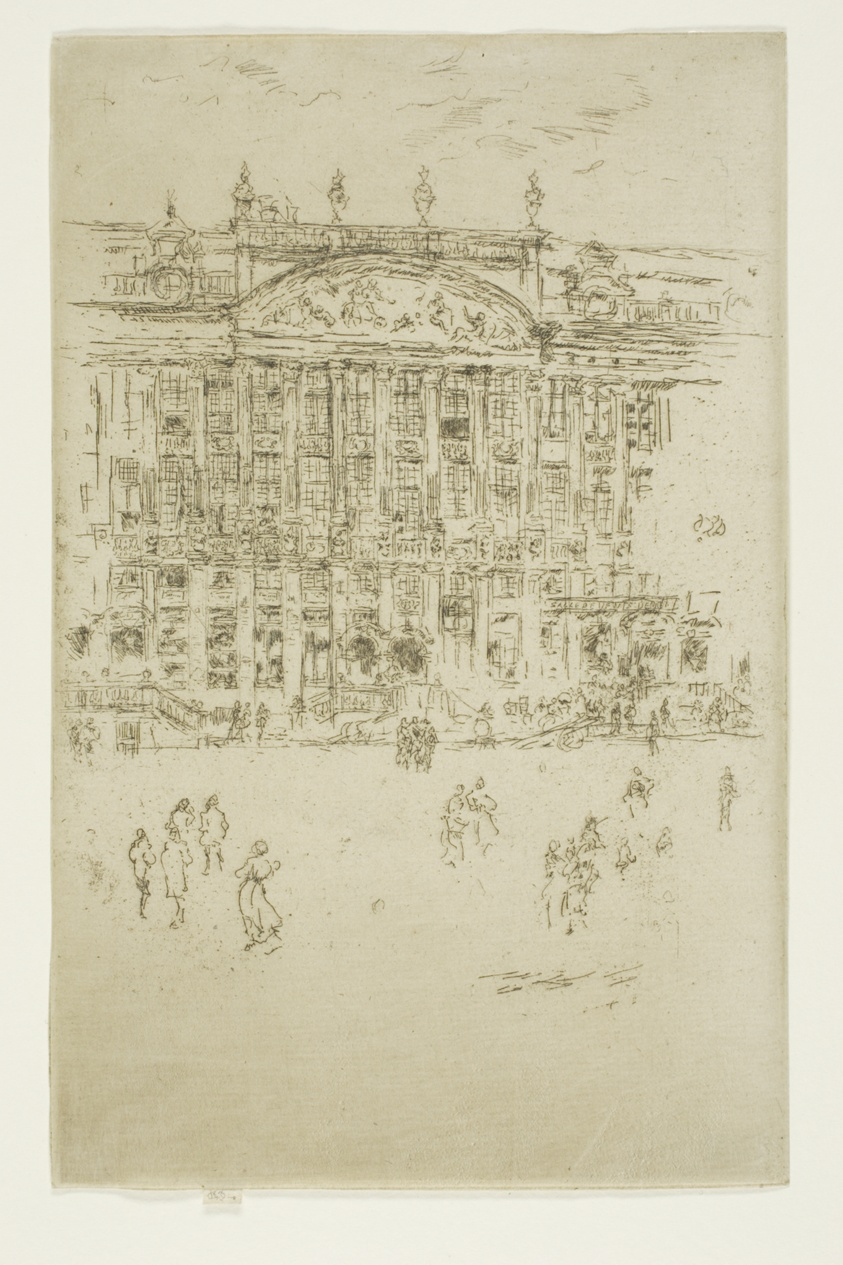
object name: Print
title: Grand' Place, Brussels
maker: James McNeill Whistler (American, 1834-1903)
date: 1887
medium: Etching and drypoint with foul biting in black ink on cream laid paper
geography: United States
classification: etching; drypoint; print; prints and drawing; foul biting; paper